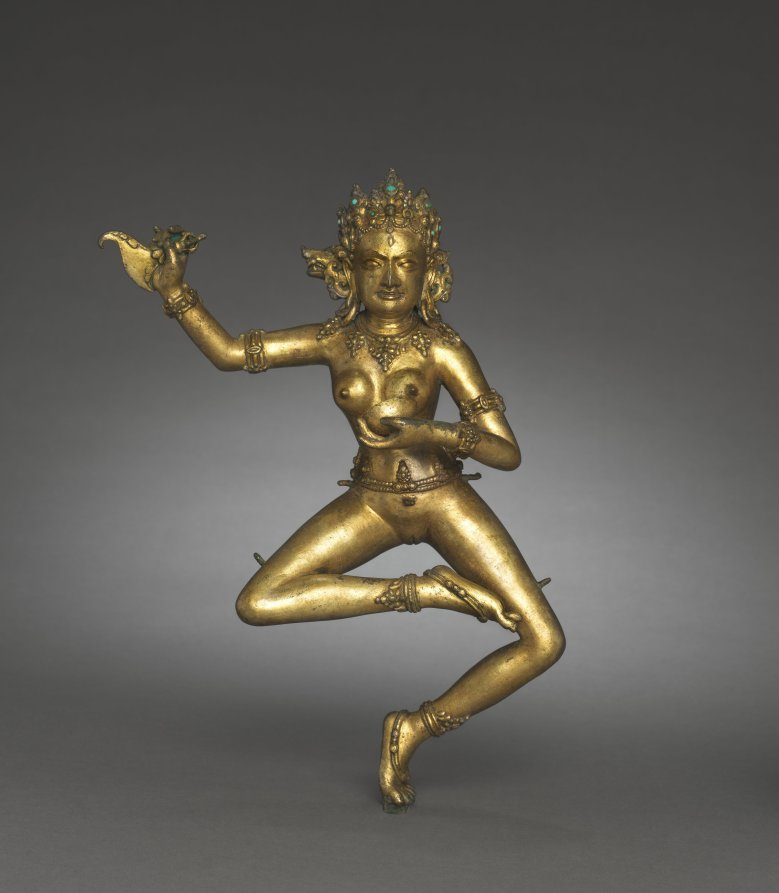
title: Vajravarahi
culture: Tibet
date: 1300s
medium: gilt bronze with turquoise inlay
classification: Sculpture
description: Vajravarahi is the tantric Buddhist counterpart to the Hindu mother goddess Varahi, identifiable by the boar head emerging above her right ear. She is a female enlightened being who emanated from the Buddhist Goddess of Perfect Wisdom. Enlightened beings transcend gender distinctions, and they can emanate as either male or female. The lithe figure dances while carrying a skull cup in her left hand. Raised up in her right hand is a ritual flaying knife with a handle in the shape of a halfvajra, used for skinning the metaphorical beast of uncontrolled passions. The pegs cast into her lower body were for holding a bone skirt.